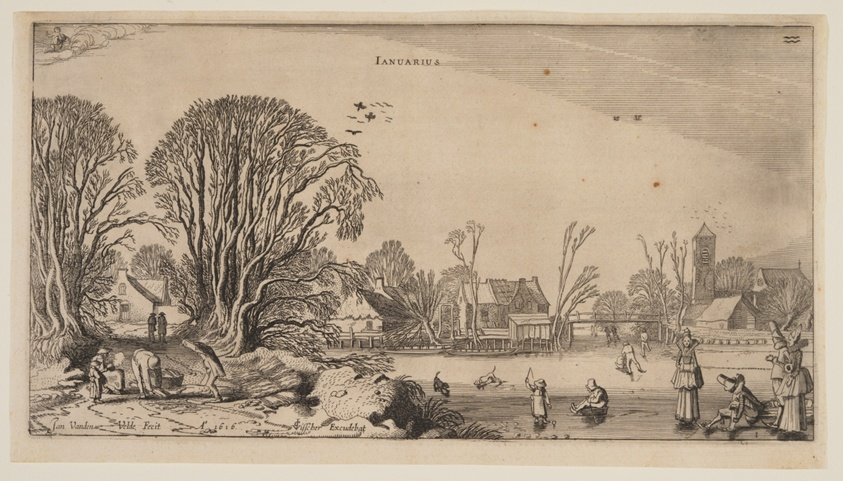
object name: Print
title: January, from The Twelve Months of the Year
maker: Jan van de Velde II (Dutch, c. 1593–1641); after Willem Buytewech (Dutch, c. 1591–1624)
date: 1616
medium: Etching on ivory laid paper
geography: Netherlands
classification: etching; paper; print; prints and drawing